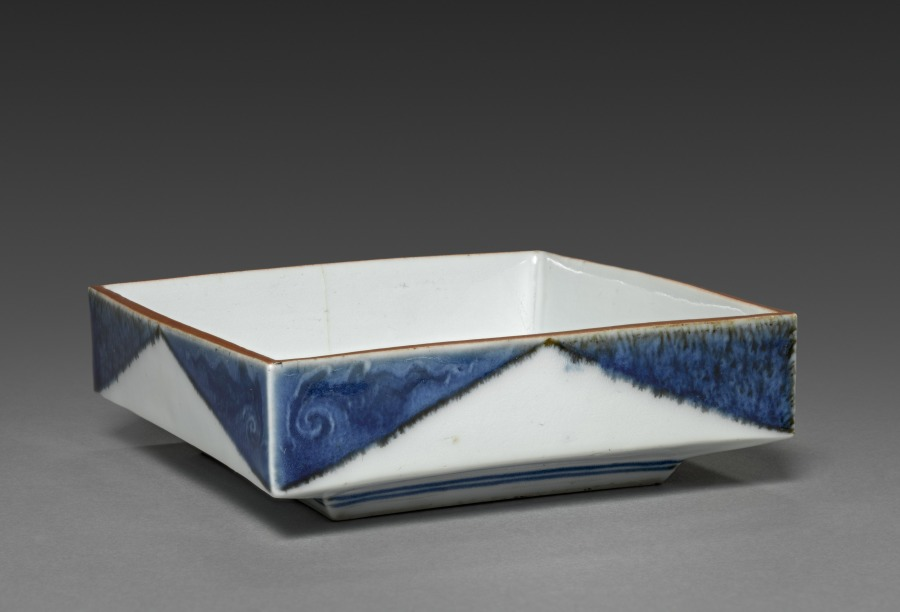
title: Side-Dish with Dandelion in Rocks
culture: Japan, Edo period (1615–1868)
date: 1700s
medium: One of a set of five dishes; porcelain with underglaze blue and overglaze iron oxide (Arita ware, Kutani style)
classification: Ceramic